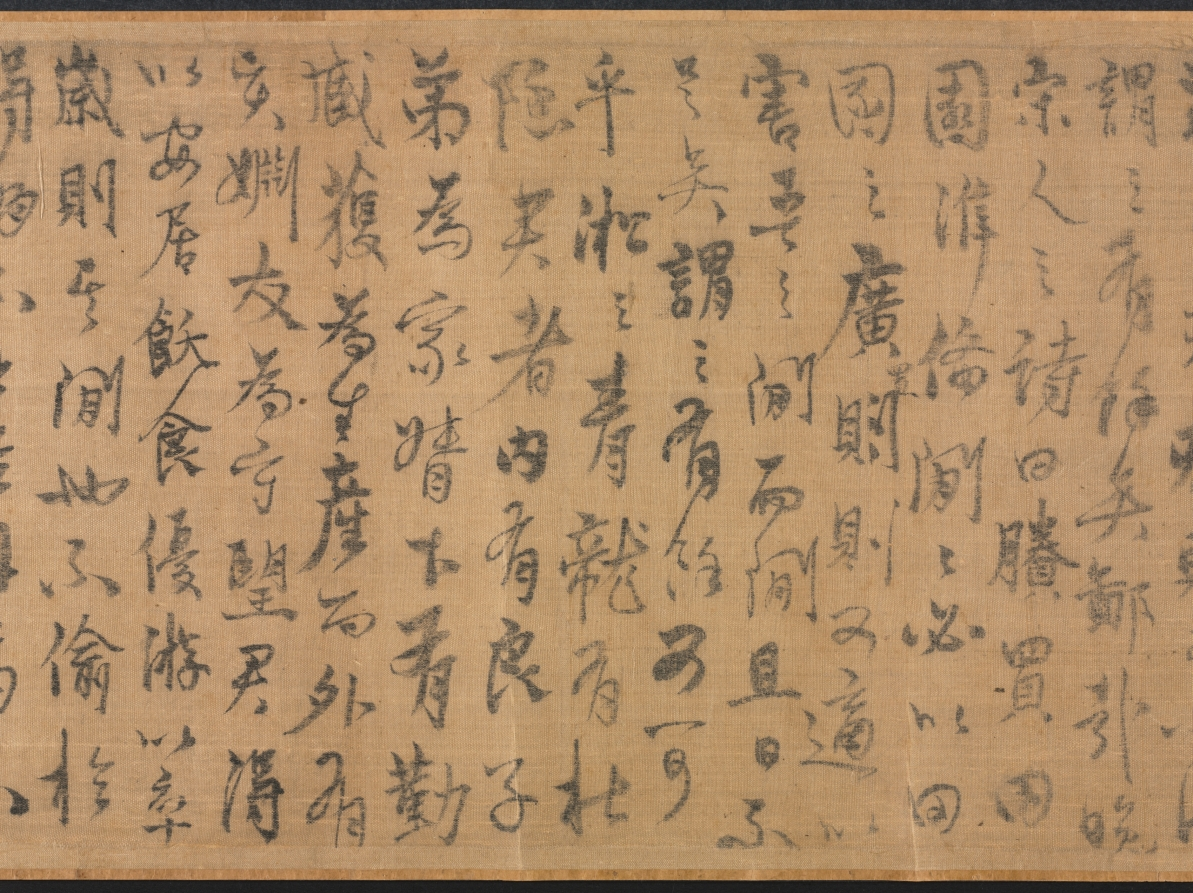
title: Leisure Enough to Spare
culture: China, Yuan dynasty (1271-1368)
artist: Yao Tingmei (Chinese, active mid-1300s)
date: 1360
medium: handscroll, ink on paper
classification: Painting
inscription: 至正廿年春正月_日作此併系鄙語于尾 地偏人遠閉柴關，滿院松陰白晝閒。 眼底風塵渾忘却，坐看流水臥看山。 吳興姚廷美畫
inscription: 23 colophons and 53 seals (dates unavailable for some): 1 colophon, dated 1360, and 2 seals of Yang Weizhen (1296-1370); 1 colophon and 3 seals of Wan Yi; 1 colophon of Zhang Junde; 1 colophon and 3 seals of Angji (act. ca. mid-14th c.); 1 colophon and 1 seal of Xu Shiquan; 1 colophon and 3 seals of Gao Yu; 1 colophon and 2 seals of Li Mingfu; 1 colophon and 2 seals of Lu Lin; 1 colophon and 1 seal of Zhang Qian; 1 colophon of Tao Tangwen; 1 colophon and 1 seal of Wu Yuangui (act. ca. 1300-60); 1 colophon of Bao Jiong; 1 colophon of Wang Zao; 1 colophon and 1 seal of Ma Chuyi; 1 colophon and 1 seal of Lin Yizhuang; 1 colophon and 1 seal of Gu Shunju; 1 colophon and 2 seals of Wang Jing; 1 colophon and 2 seals of Lin Shouchang; 1 colophon and 1 seal of Gao Zhidao; 1 colophon of Lin Xun; 1 colophon, dated 1359, and 2 seals of Meng Weicheng (act. mid-14th c.); 1 colophon and 1 seal of Meng Zhiji (act. mid-l4th c.); 14 seals of Liang Qingbiao 梁清標 (1620-1691); 1 poem dated 1755 and 5 seals of the Qianlong 乾隆 emperor (r. 1736-95); 2 seals of the Jiaqing 嘉慶 emperor (r. 1796-1821); 3 seals of the Xuantong 宣統 emperor (r. 1909-11).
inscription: Title on frontispiece by Zhang Bi 章弼: Signed Gongchen 拱辰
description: Seclusion and leisure—the ideals of the literati, or scholar-gentlemen—are expressed in this mature work by Yao Tingmei. The theme acquired special meaning at a time of the military uprisings near the end of the Yuan dynasty. Dedicated to an ascetic named Du, this work combines painting, calligraphy, and poetry; following the painting are more than 20 poems and essays written by notable scholars, one of whom was the calligrapher Yang Weizhen. It reveals not only the aesthetic taste of the literati but also the practice of contributing artistic and literary works to fulfill social obligations. Yao's painting demonstrates his individual style derived from various ancient masters (Guo Xi, Dong Yuan, and Juran). Yang Weizhen's calligraphy exhibits his bold, vigorous style and his intent to capture the spirit of antiquity in art.